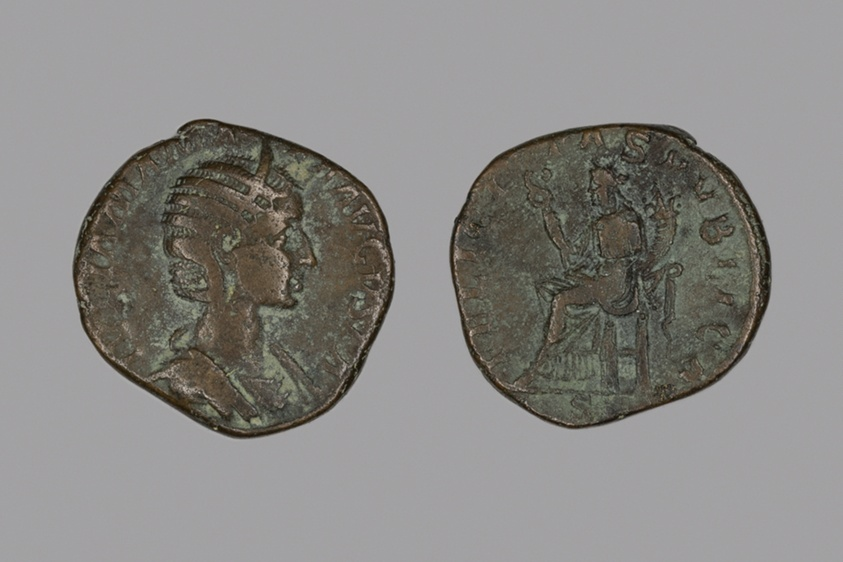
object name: Coin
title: Sestertius (Coin) Portraying Julia Mamaea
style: roman (ancient, style or period)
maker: Roman, minted in Rome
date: 222-235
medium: Bronze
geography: Roman Empire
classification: coin; ancient art